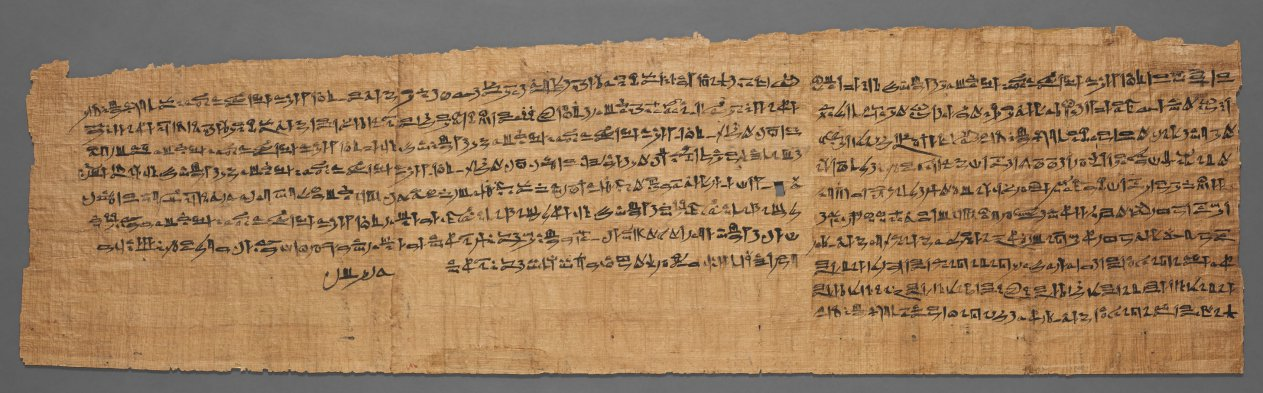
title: Book of the Dead of Bakenmut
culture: Egypt, Third Intermediate (1069–715 BCE), Dynasties 21–22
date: 1000–900 BCE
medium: papyrus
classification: Funerary Equipment